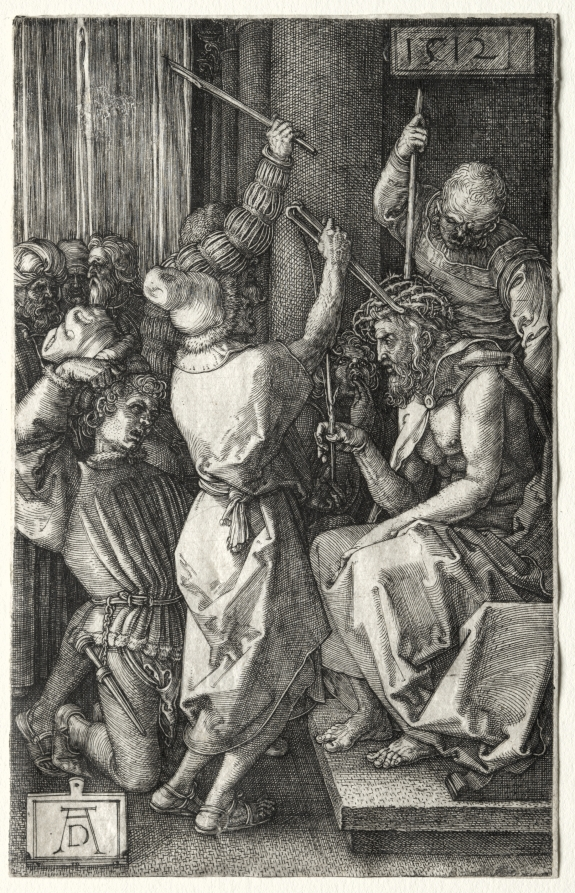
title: Christ Crowned with Thorns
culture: Germany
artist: Albrecht Dürer (German, 1471–1528)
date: 1512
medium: engraving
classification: Print